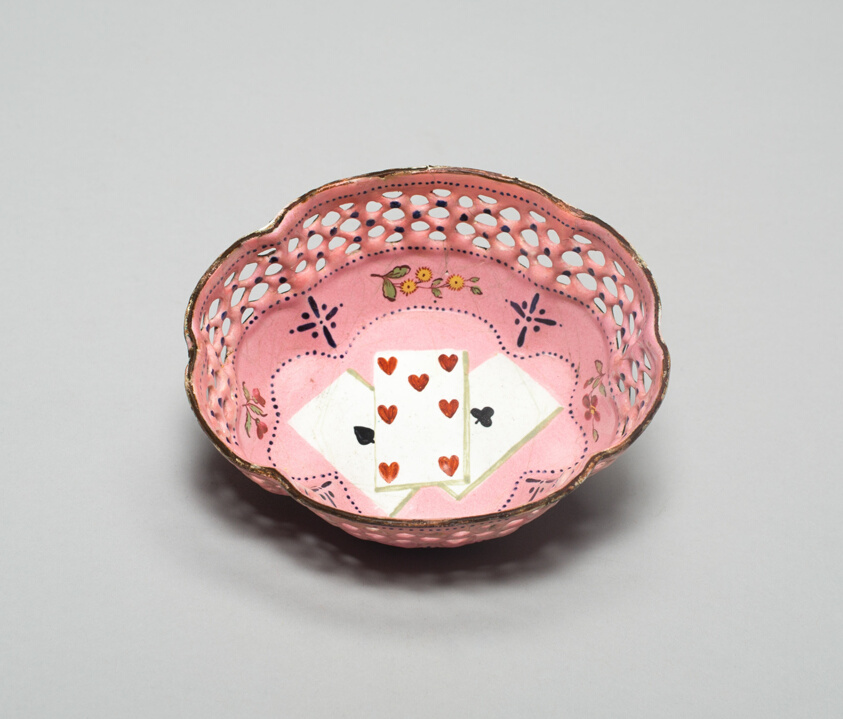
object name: Metalwork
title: Counter Tray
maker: South Staffordshire, England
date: c. 1790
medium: Polychrome enamel on copper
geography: South Staffordshire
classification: tableware; enamel; metalwork